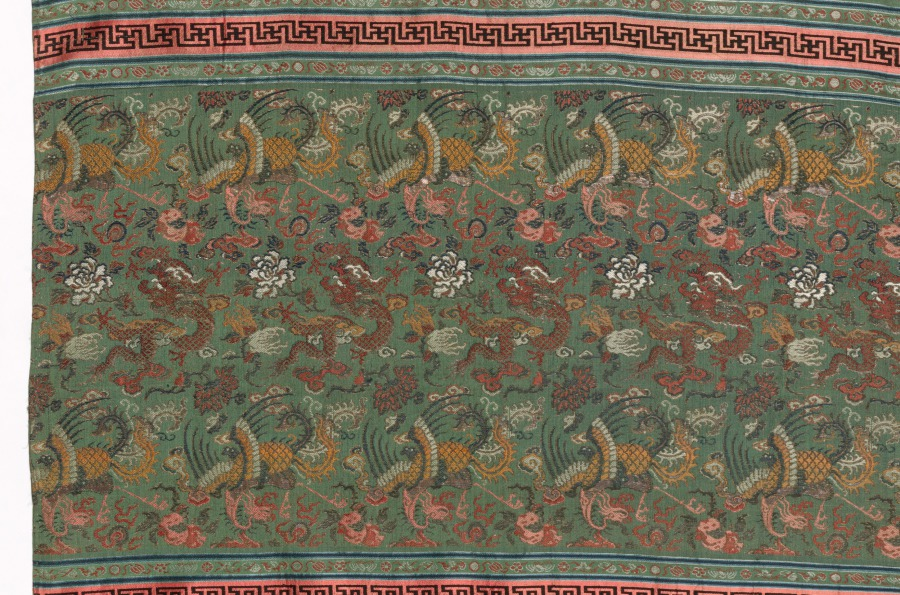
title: Compound Weave Textile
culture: China, Qing dynasty (1644-1911)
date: 1800s ?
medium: compound weave: silk and gold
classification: Textile